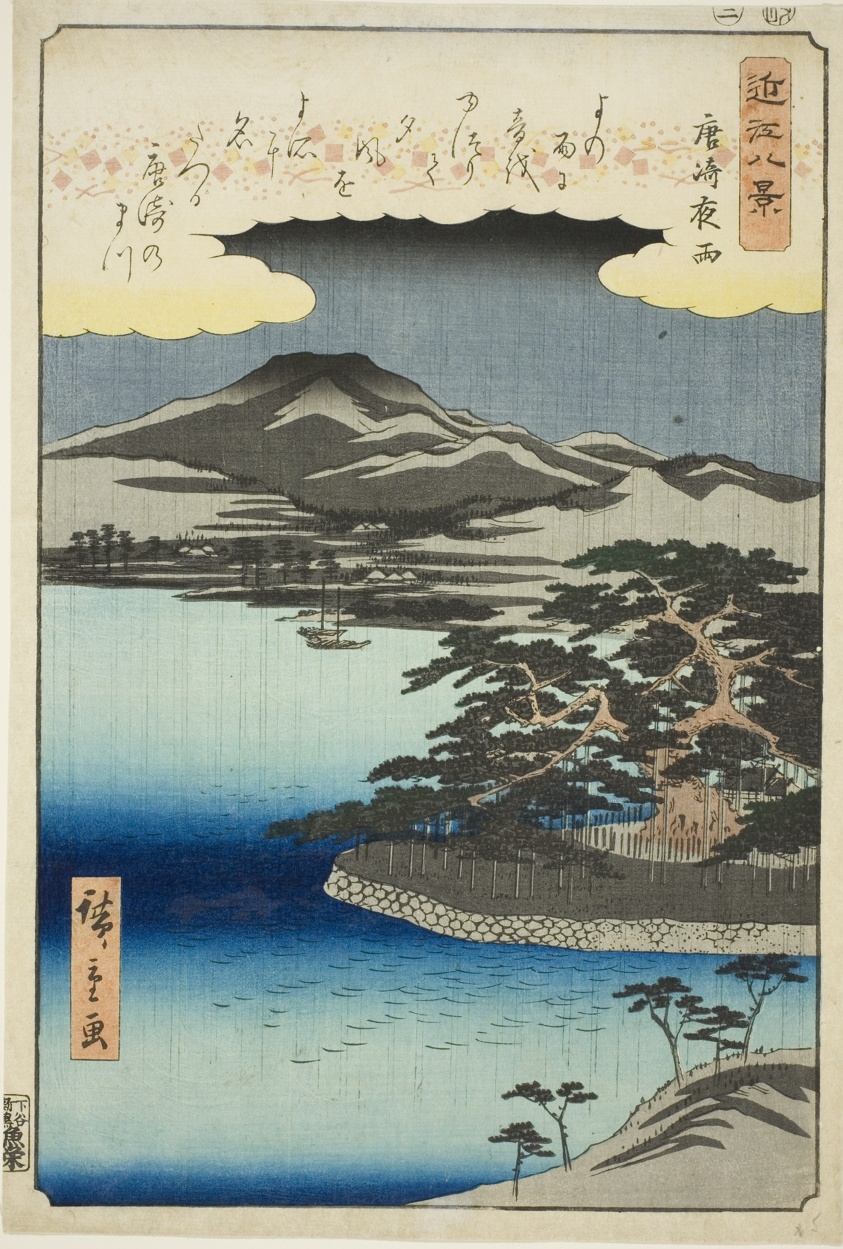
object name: Print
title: Night Rain at Karasaki (Karasaki yau), from the series "Eight Views of Omi (Omi hakkei no uchi)"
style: Japanese (culture or style)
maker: Utagawa Hiroshige 歌川 広重; Japanese, 1797-1858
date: 1857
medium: Color woodblock print; oban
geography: Japan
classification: woodblock print; print; asian art